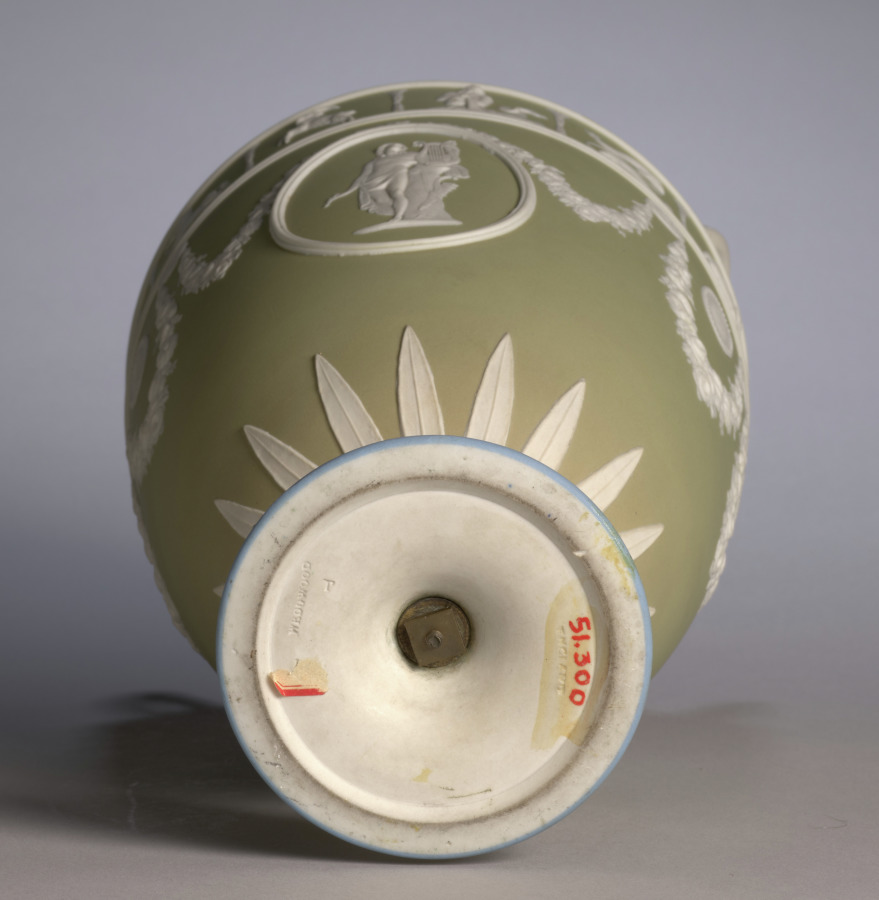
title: Vase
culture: England, Staffordshire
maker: Josiah Wedgwood and Sons (British, Staffordshire, est. 1759)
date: c. 1850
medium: jasper ware with relief decoration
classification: Ceramic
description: Wedgwood's tricolor jasperware first became popular in the 1770s during a period of fascination with neoclassical decoration. This vase was probably made around 1850 during the period when this type of decoration was revived. The relief medallions depict two versions of the Greek god Apollo, the god of music, next to his harp or lyre.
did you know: See cover record.